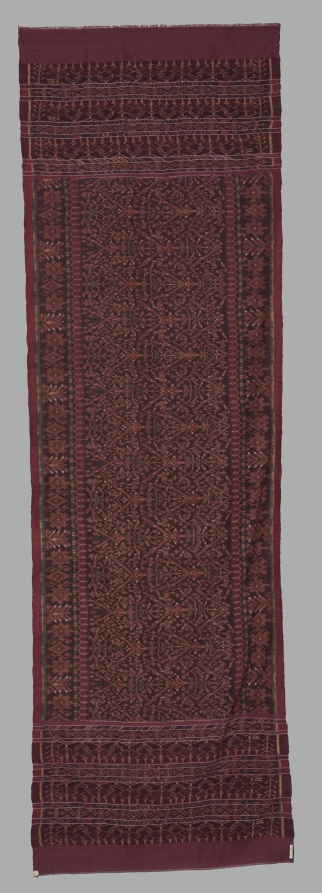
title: Sarong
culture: Indonesia, Sumatra, 20th century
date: c. 1900s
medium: silk and cotton plain weave: ikat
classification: Textile